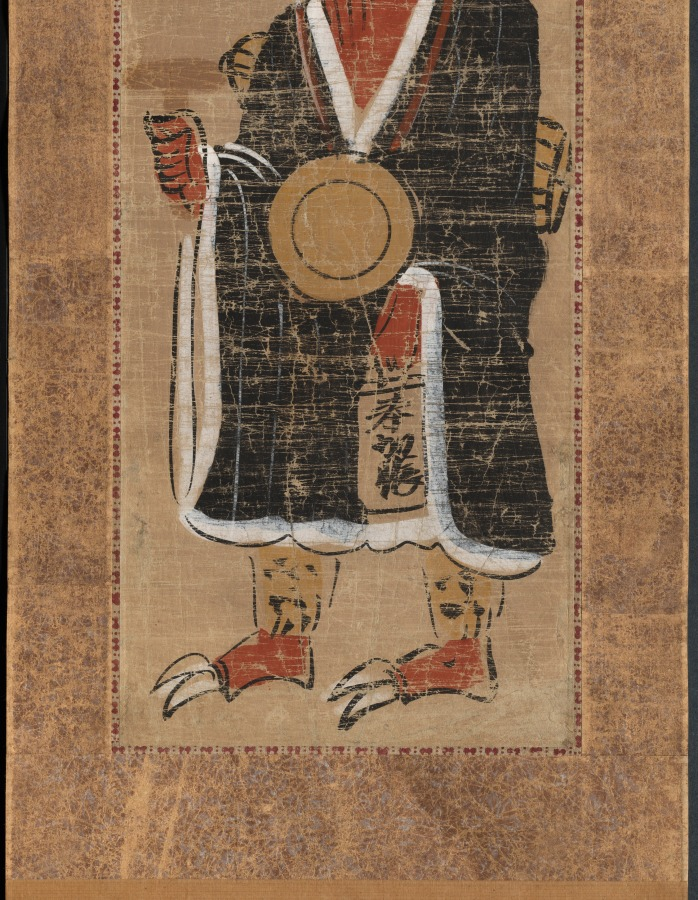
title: Demon Intoning the Name of the Buddha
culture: Japan, Edo period (1615–1868)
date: 1700s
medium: hanging scroll, ink and color on paper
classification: Painting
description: Images like this one that depicts a demon in the guise of an itinerant monk intoning the name of the Buddha are called Otsu-e, or "Otsu paintings." Otsu-e were made as souvenirs for travelers passing through the station of Otsu along the Tokaido, the route stretching from Edo (modern-day Tokyo) to Kyoto. Realized through a combination of woodblock printing, rapid brushstrokes, embellishment with color and gold pigments by stencil or by hand, the earliest Otsu-e, produced in the 17th century, were Buddhist and Shinto icons. Later images included figures popular from Kabuki plays, as well as scenes illustrating parables.